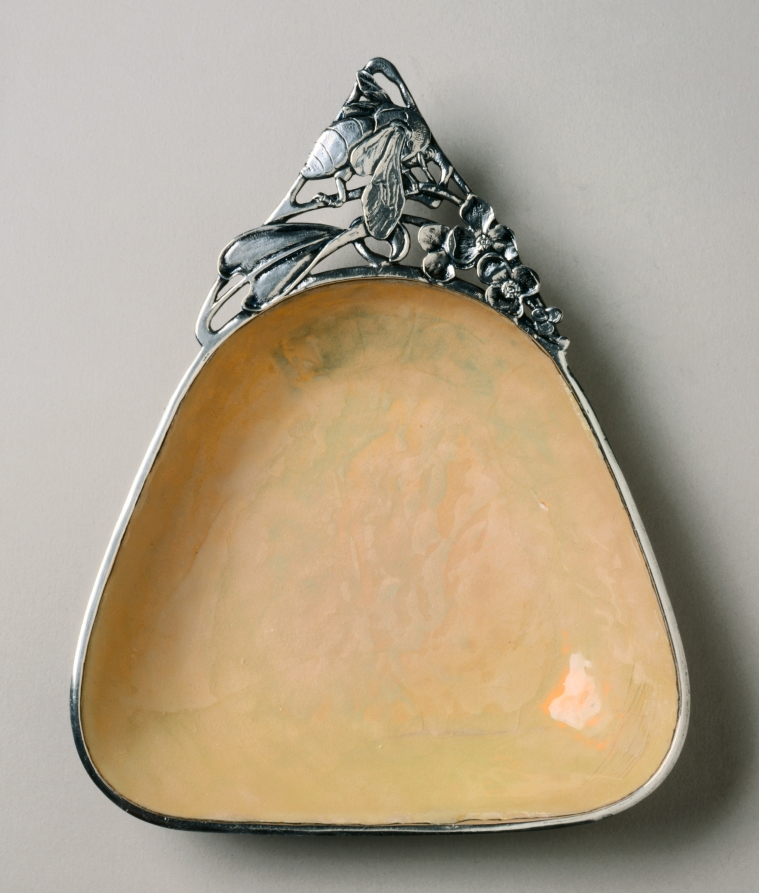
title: Dish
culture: America, Ohio, Cleveland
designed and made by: Horace Potter (1873–1948)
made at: Potter Studios (American)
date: c. 1910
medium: silver and enamel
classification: Silver